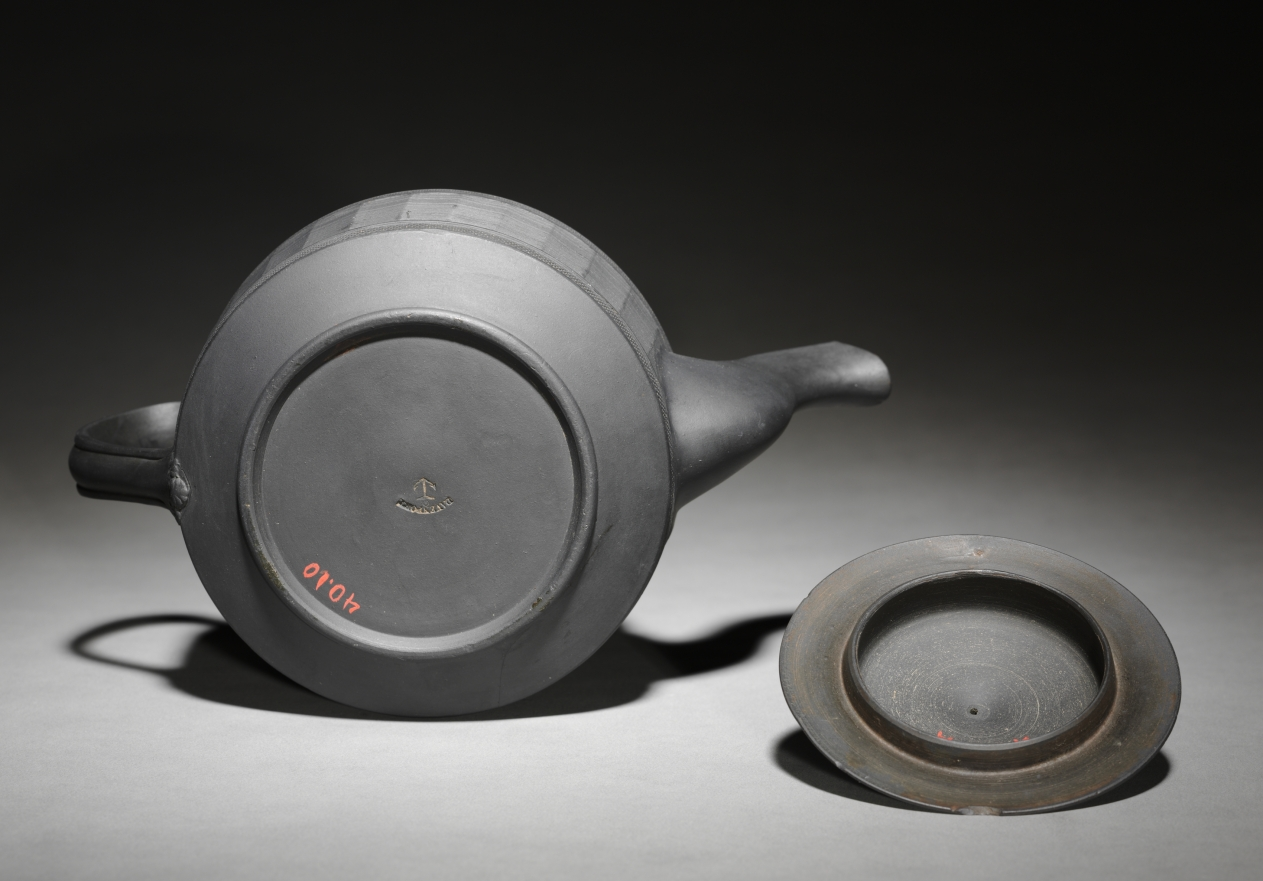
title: Teapot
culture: England, Staffordshire, 19th century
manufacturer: Davenport Pottery and Porcelain Factory (British)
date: 1800s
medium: black basalt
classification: Ceramic